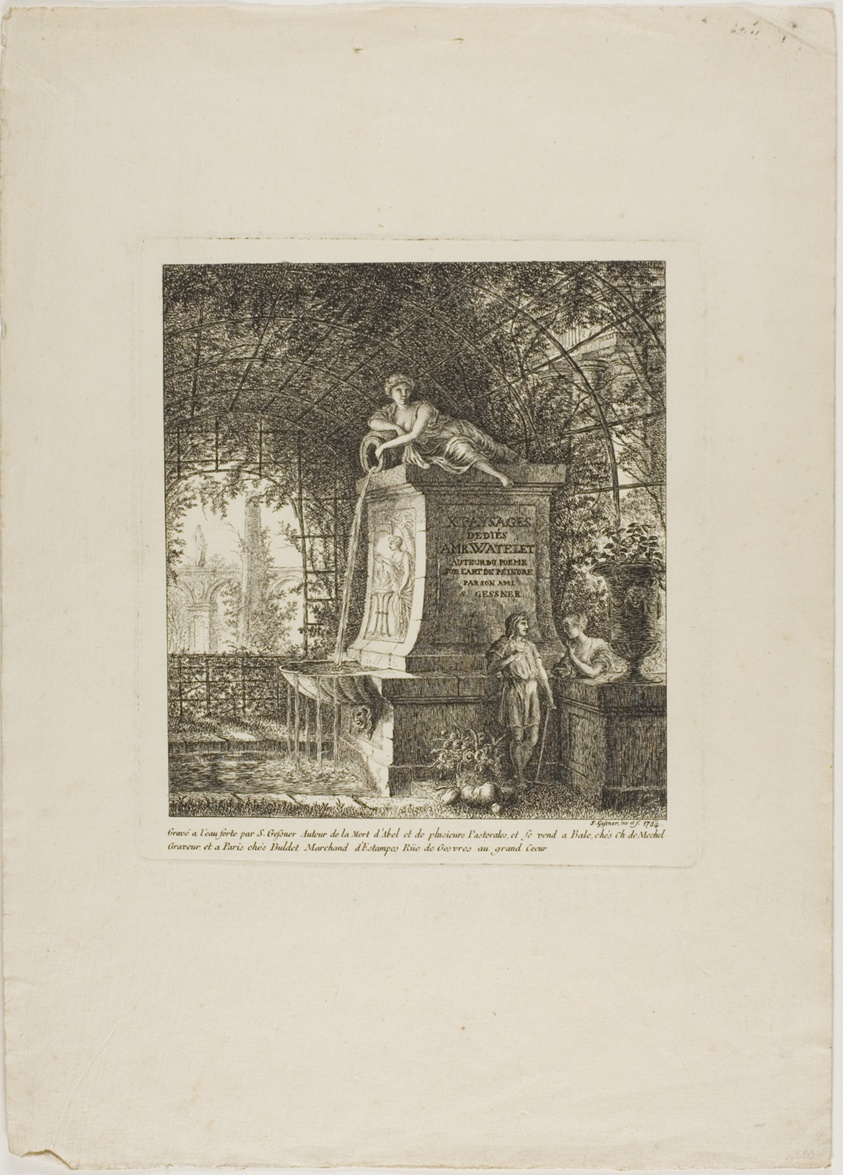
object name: Print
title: The Trellised Fountain, frontispiece from Paysages Dédiés à M. Warelet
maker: Salomon Gessner (Swiss, 1730-1788)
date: 1764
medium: Etching on cream laid paper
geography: Switzerland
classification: etching; print; prints and drawing